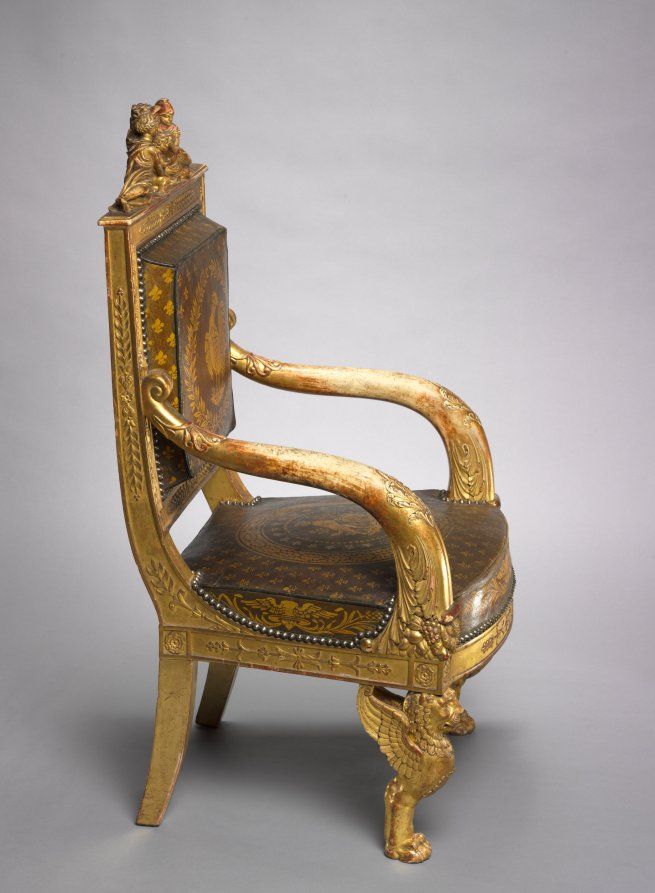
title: Child's Throne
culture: France, Paris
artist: Pierre-Marie Balny le Jeune (French, 1832)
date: 1822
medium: carved and gilded wood, leather upholstery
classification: Furniture and woodwork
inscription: inscribed with stencils inside back rail: BLONDEL TAPISSIER/RUE ST. ANTOINE N 72 1822 inscribed in ink lower edge back rail: 12 JANVIER 18[22?]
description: This chair was made for the young, presumed successor to the French throne who ruled briefly as Henri V in 1830, the last of the direct Bourbon line. He is depicted at the center of the top rail protected by female figures representing France and Minerva, the Roman goddess of wisdom. Fleurs-de-lis and the Gallic rooster, symbols of French royalty and the French people, decorate the upholstery.